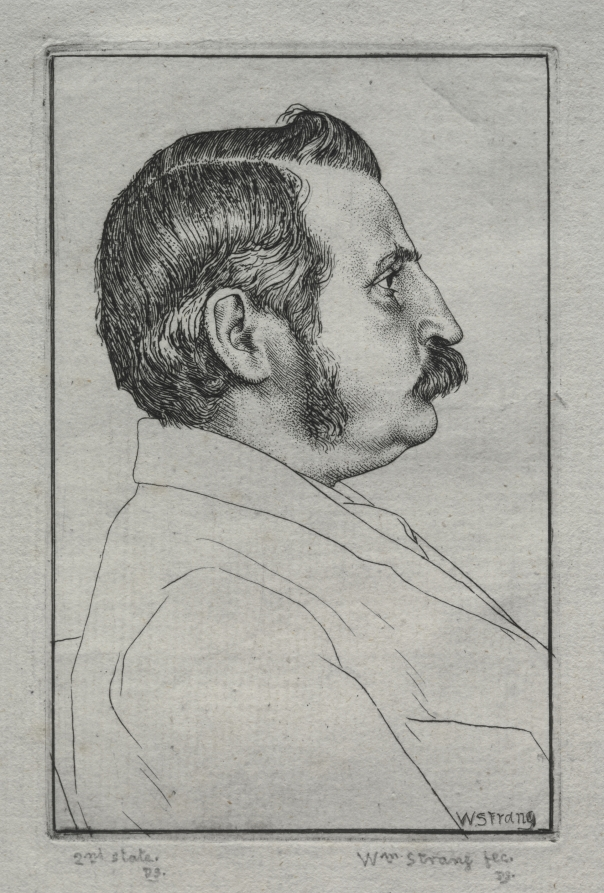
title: Henry Austin Dobson, No. 2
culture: England, 19th century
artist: William Strang (British, 1859–1921)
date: 1894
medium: etching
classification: Print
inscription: signed in plate: W. Strang (l.r); inscribed in graphite below image: 2nd state/ D.S. (l.l.); Wm Strang fec./ D.S. (l.r)